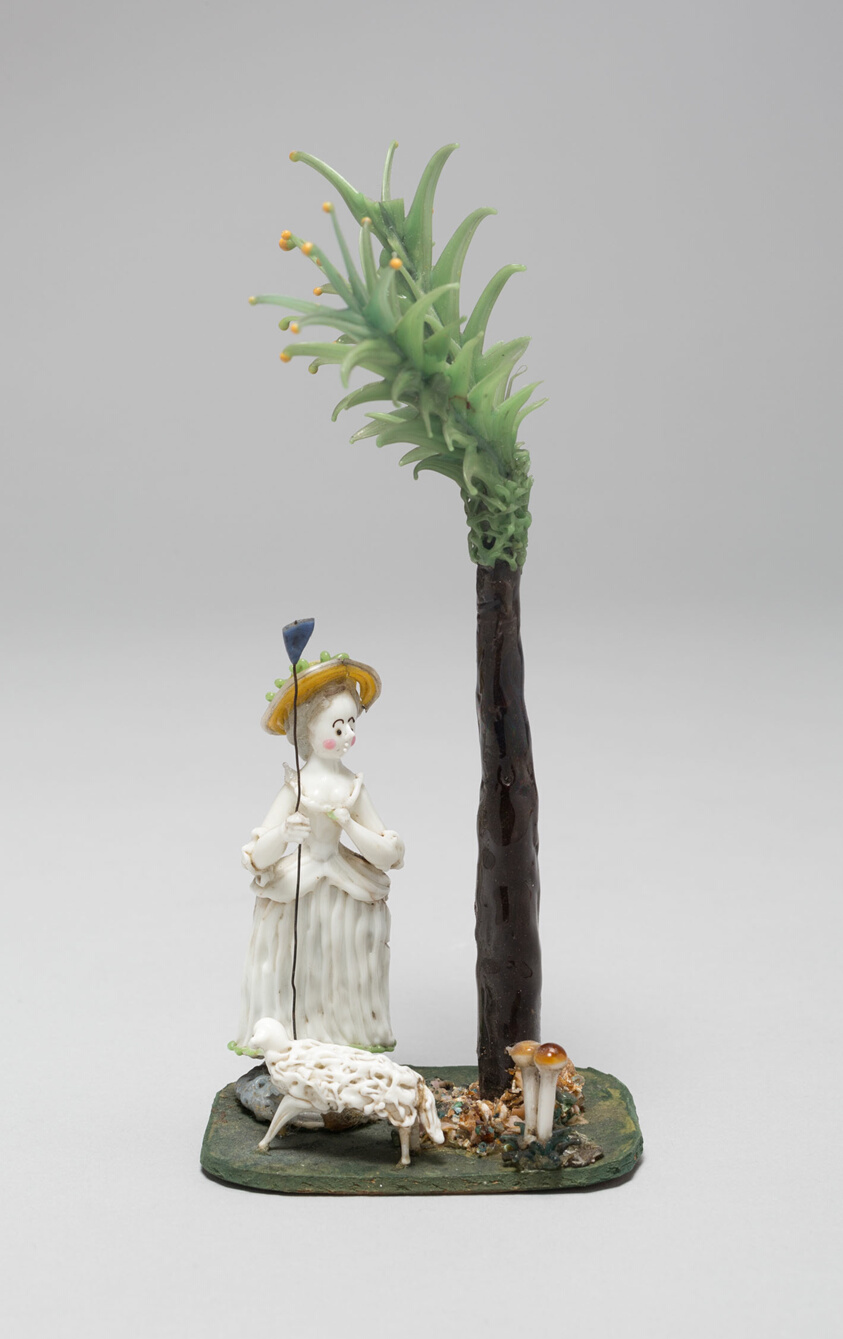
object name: Glass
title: Shepherdess Under a Tree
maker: Nevers, France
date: Late 18th century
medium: Glass; lampwork (verre de Nevers), metal armature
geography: France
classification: decorative object/ornament; lampwork; glass; european decorative arts